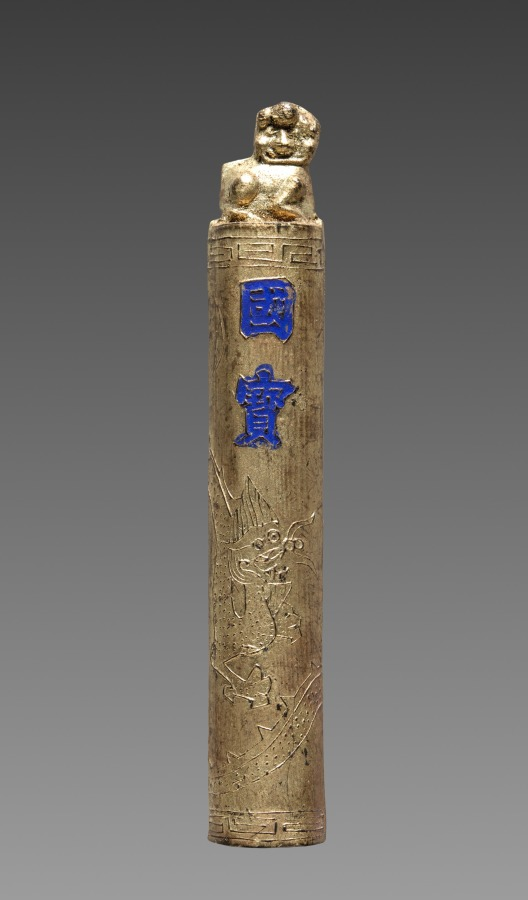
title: Ink Cake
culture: China, Qing dynasty (1644-1911)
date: 1644–1911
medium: ink cake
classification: Miscellaneous